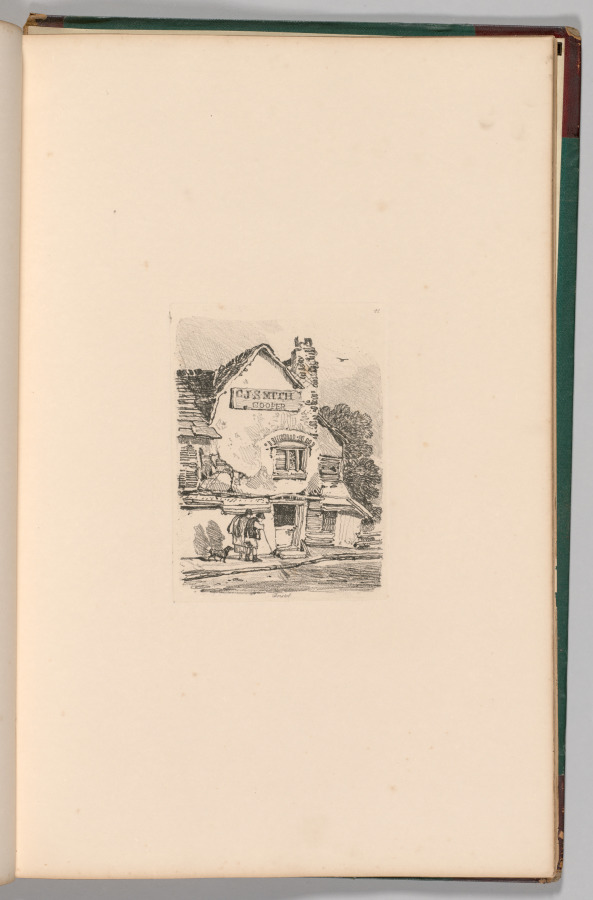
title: Liber Studiorum: Plate 41, House at Bristol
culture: England, 19th century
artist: John Sell Cotman (British, 1782–1842)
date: 1838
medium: softground etching, from a bound volume containing 48 plates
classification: Bound Volume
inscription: In plate, within image, upper right: 41; in plate, below image: Bristol